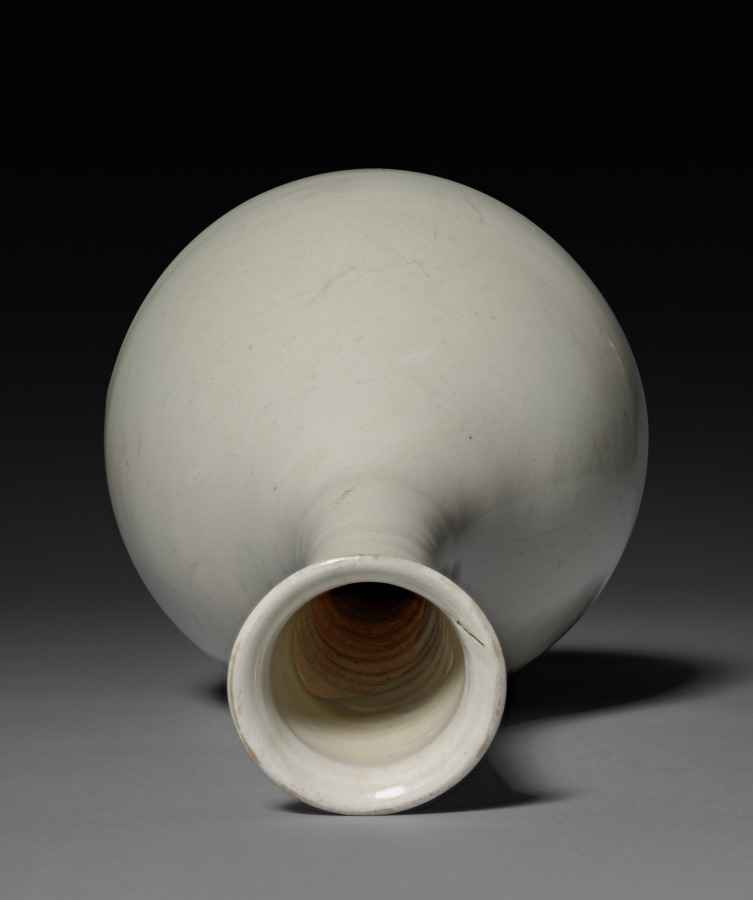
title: Bottle Vase: Ding ware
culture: China, Jin dynasty (1115-1234)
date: 12th Century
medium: glazed white porcelain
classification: Ceramic